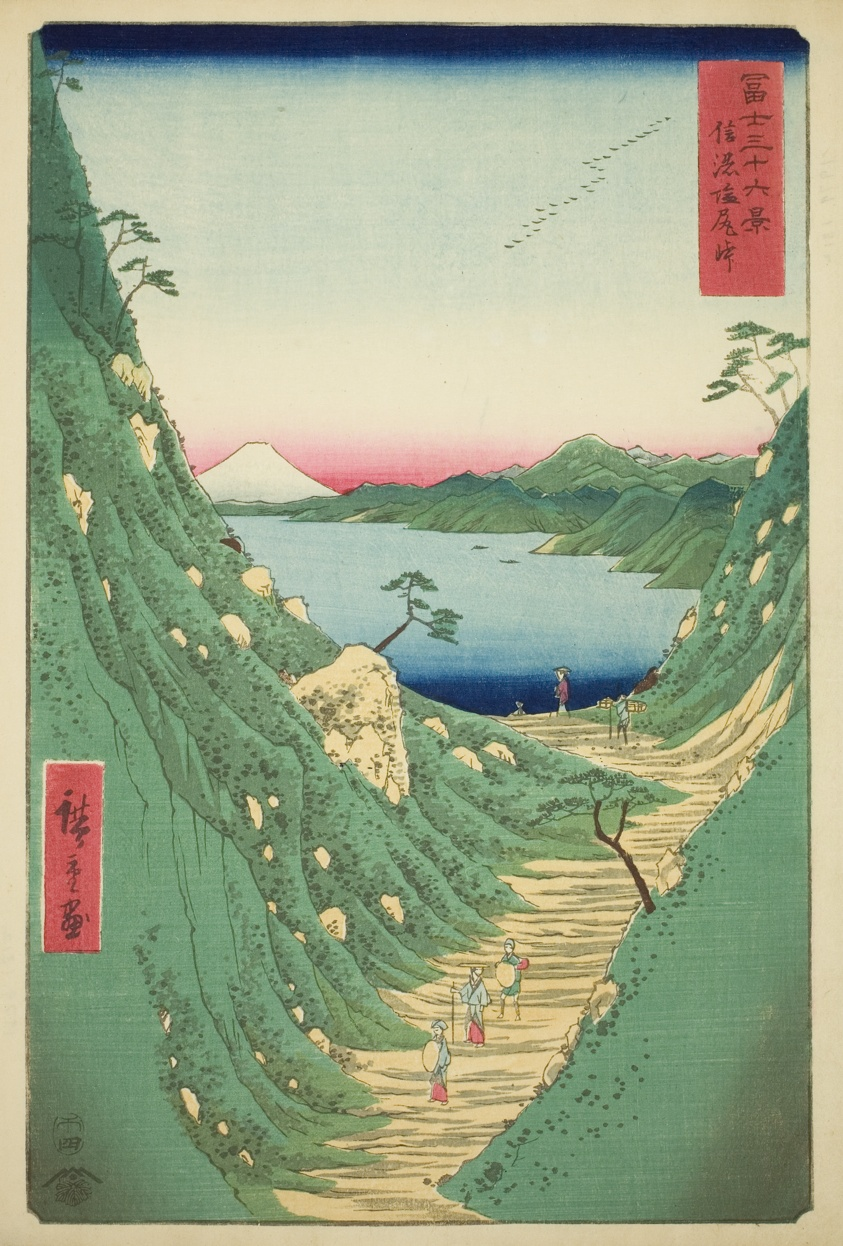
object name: Print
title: Shiojiri Pass in Shinano Province (Shinano Shiojiri toge), from the series "Thirty-six Views of Mount Fuji (Fuji sanjurokkei)"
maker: Utagawa Hiroshige 歌川 広重; Japanese, 1797-1858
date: 1858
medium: Color woodblock print; oban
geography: Japan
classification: print; asian art